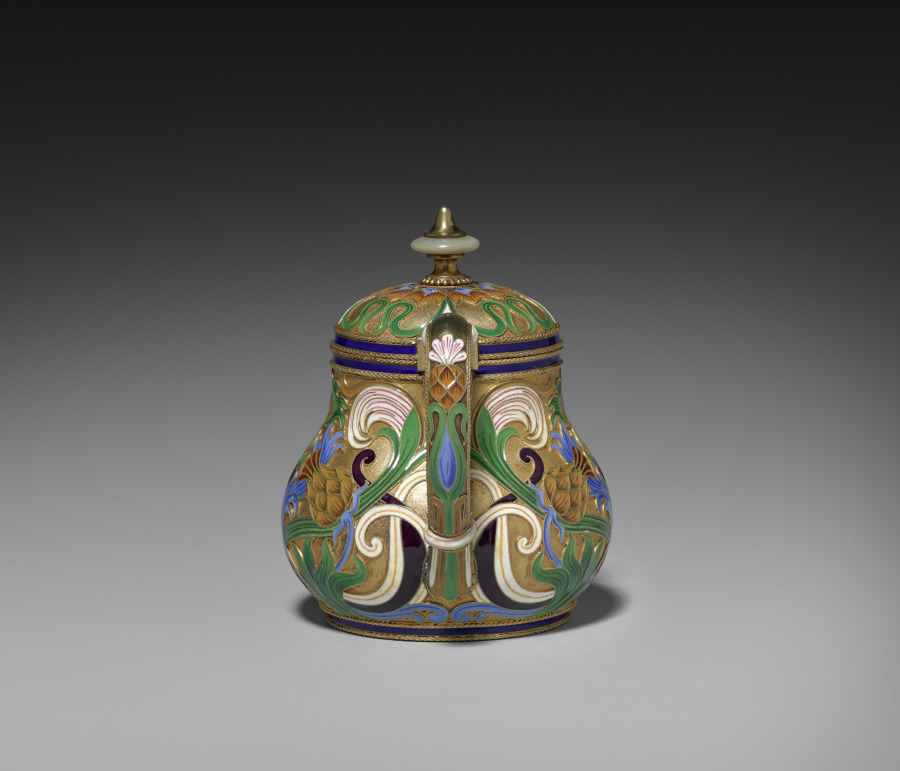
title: Covered Teapot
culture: Russia, St. Petersburg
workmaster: attributed to Feodor Ivanovich Rückert (Russian, 1840–1917)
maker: House of Fabergé (Russian, 1842–1918)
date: 1887–96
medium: silver gilt, opaque cloisonné enamel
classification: Miscellaneous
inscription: 84, St. George [assay mark for Moscow, 1882-1896]; C. Fabergé (in Cyrillic); double-headed eagle [imperial warrant]; St. George; initials of Carl Fabergé (in Cyrillic).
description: Fabergé’s craftsmen in Moscow, especially under the watchful eye of workmaster Feodor Rückert, became known for their work in the pan-Slavic or neo-Russian style, hearkening back to 17th-century motifs of Russian folk art. Often on rather conventional shapes, Rückert and his silversmiths created an explosion of color, achieved through the historic technique of cloisonné enamel in which tiny metal lines are soldered to the surface then filled with glass powders in various colors and fired to create a high gloss finish. The result is a spectacular evocation of the 17th-century originals. Far from mere copies, however, Rückert's designs, such as this tea service, employ naturalistic or abstract motifs in a thoroughly modern adaptation of a remarkable earlier period of Russian art and decoration.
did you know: This covered teapot is part of a larger tea service.